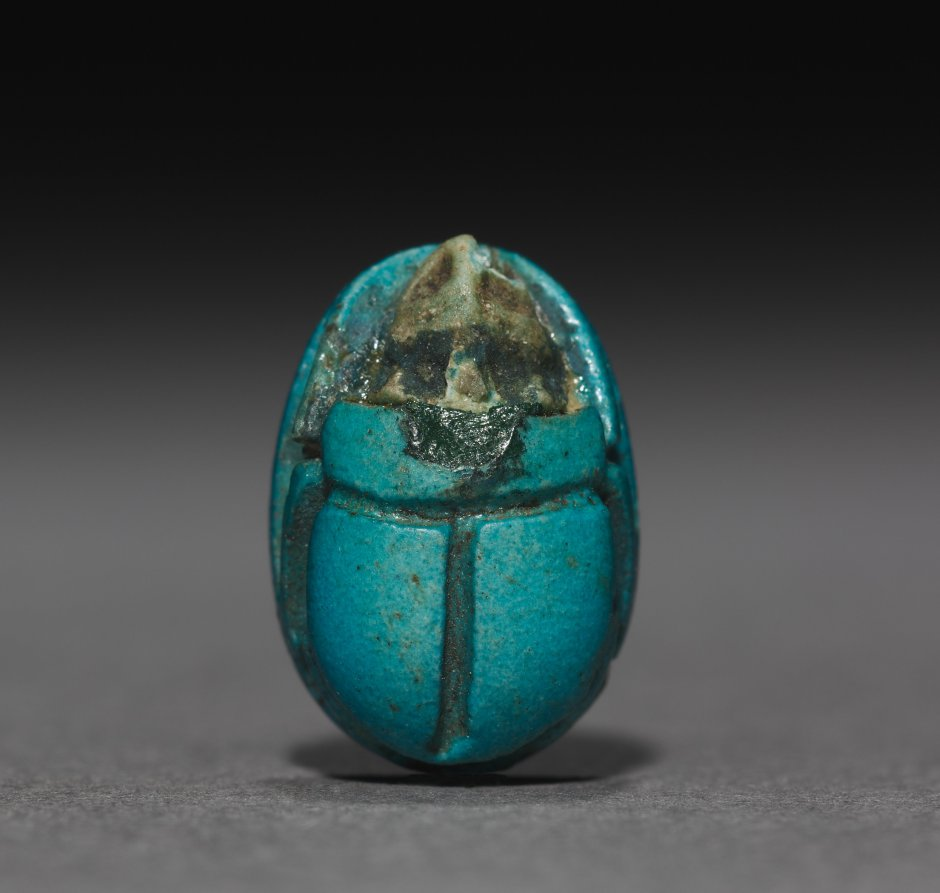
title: Scarab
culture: Egypt, New Kingdom (1540–1069 BCE), Dynasty 18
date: 1350–1296 BCE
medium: turquoise faience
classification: Scarabs